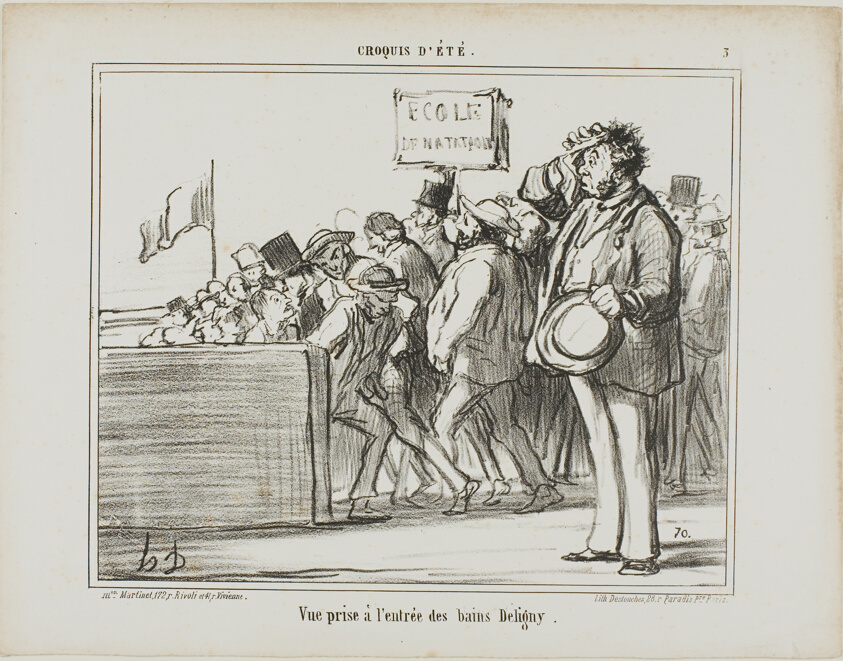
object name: Print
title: Entrance to the public baths at Deligny, plate 3 from Croquis D'été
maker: Honoré Victorin Daumier; French, 1808-1879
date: 1859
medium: Lithograph in black on ivory wove paper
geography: France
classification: lithograph; print; prints and drawing